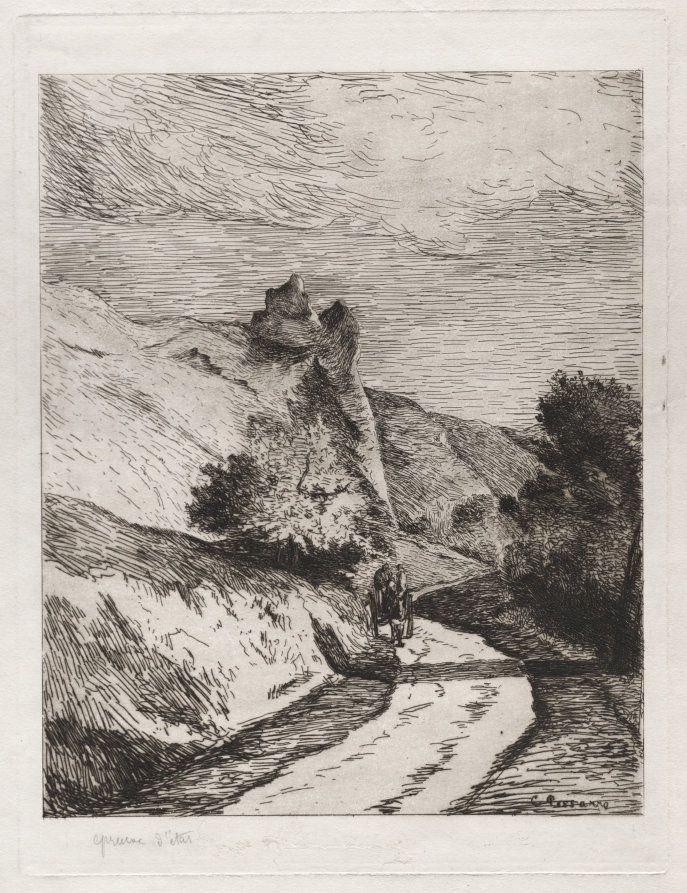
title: La Roche-Guyon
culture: France, 19th century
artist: Camille Pissarro (French, 1830–1903)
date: 1866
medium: etching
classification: Print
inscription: signed, at lower right, in plate: C. Pissarro; inscribed, in pencil, at lower left: epreuve d'état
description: A very early etching by the Impressionist artist Camille Pissarro, this view of the massive rocks at La Roche-Guyon reveals the artist’s painterly attitude toward printmaking. Using only the etched line and a layer of ink left on his printing plate's surface, Pissarro created a dramatic landscape filled with brilliant sunlight and soft shadows.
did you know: Camille Pissarro favored rural life and lived in the small village of La Roche-Guyon during the 1860s, when this print was made.